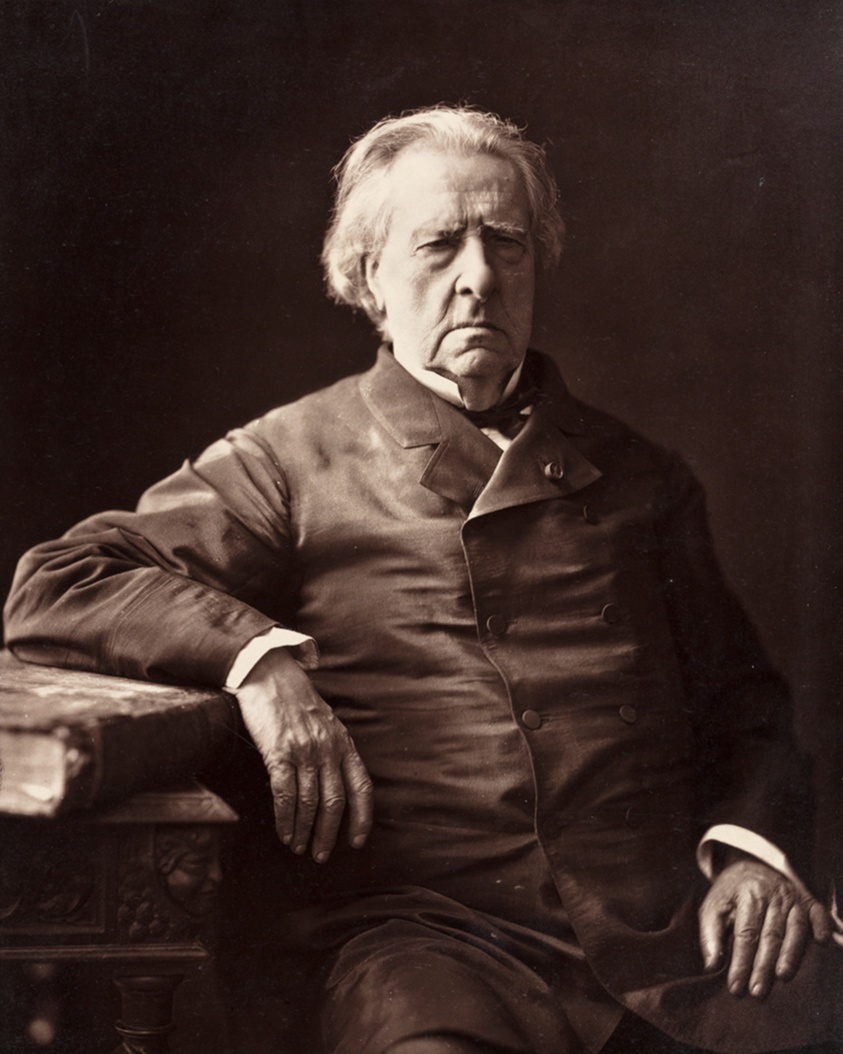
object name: Photograph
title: Baron Isidore Justin Séverin Taylor (Belgian playwright and travel writer, 1789-1878)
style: 19th century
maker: Nadar (Gaspard Félix Tournachon) (French, 1820–1910)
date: 1872/75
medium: Woodburytype, from the periodical “Galerie Contemporaine Littéraire, Artistique” (1877), volume 4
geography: France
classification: woodburytype; photomechanical process; photography; photograph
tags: Collected by Hugh Edwards, Contemporaine Littéraire